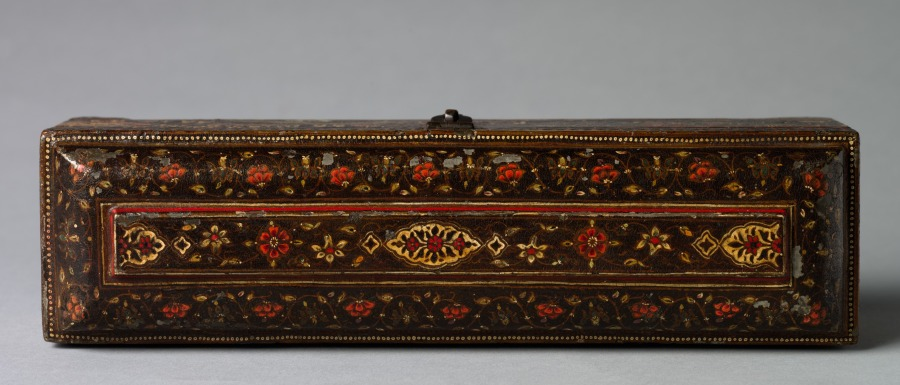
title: Rajput Box with Various Scenes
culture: India, Rajasthan, early 19th Century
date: c. 1800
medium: painted wood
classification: Painting